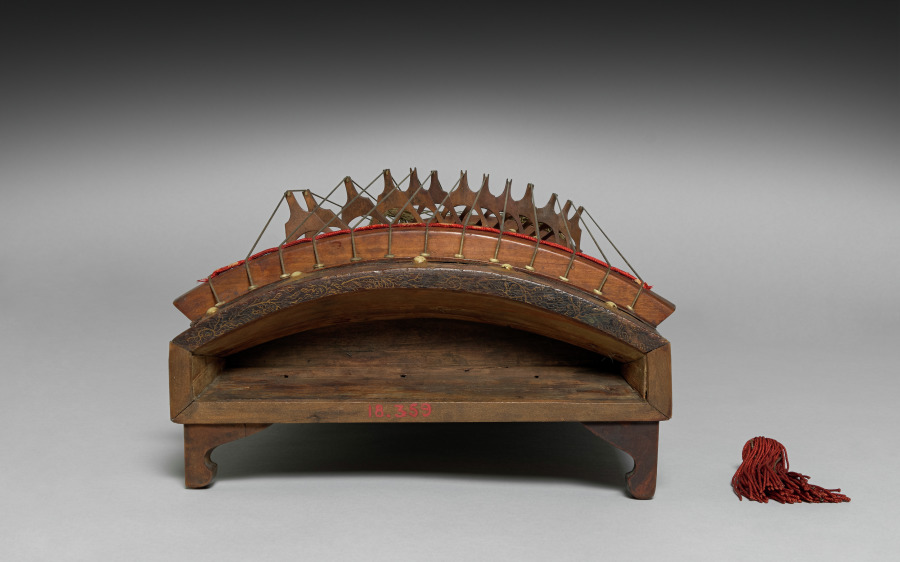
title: Koto (Zither)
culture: Japan, Edo period (1615–1868)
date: early to mid-1800s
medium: Wood with colored lacquer, sprinkled gold powder (maki-e), textile, and silk strings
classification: Musical Instrument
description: This koto has an elaborately decorated surface, suggesting that it was meant to be admired as a decorative object rather than played as a musical instrument. The vertical design shows a profusion of chrysanthemum flowers and miscanthus grass above a brushwood fence as well as a pair of butterflies.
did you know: The koto descended from the guzheng, a Chinese zither first imported to Japan in the seventh century.